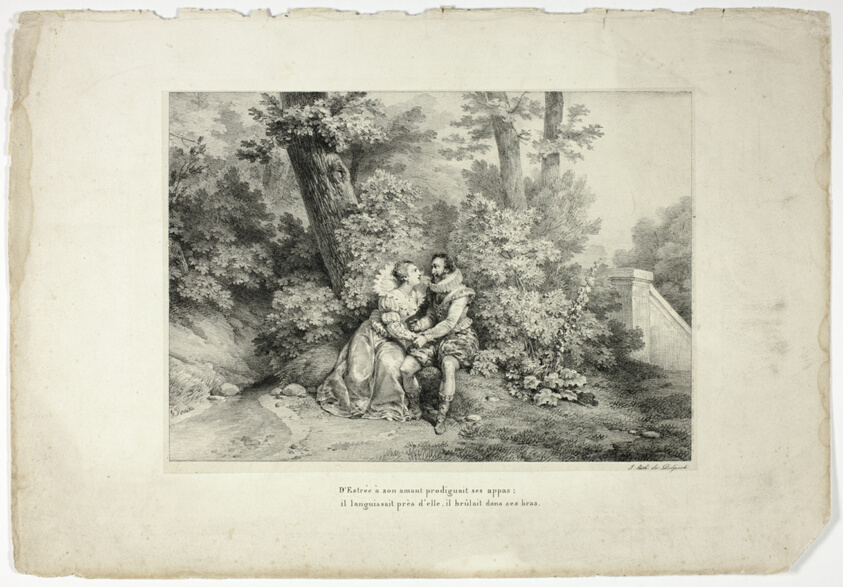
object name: Print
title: D'Estrée à son amant prodiguait ses appas...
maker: Horace Vernet (French, 1789-1863); poem by Voltaire (French, 1694-1778); printed by Francois Seraphin Delpech (French, 1778-1825); published by Dubois (French, 18th-19th century)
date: 1825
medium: Lithograph in black on cream chine, laid down on ivory wove paper (chine collé)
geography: France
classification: lithograph; print; prints and drawing